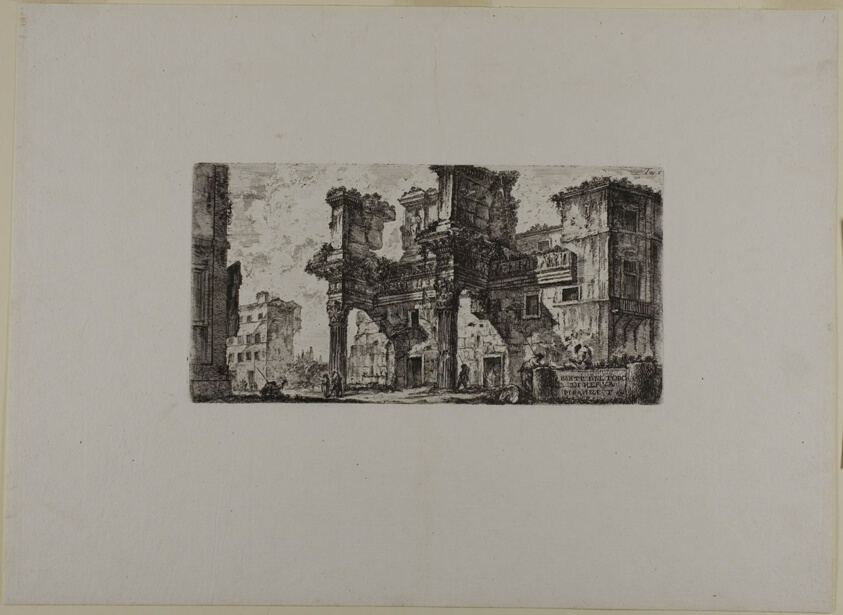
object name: Print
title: Part of the Forum of Nerva, plate five from Some Views of Triumphal Arches and other monuments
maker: Giovanni Battista Piranesi (Italian, 1720-1778)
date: published 1748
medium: Etching in black on ivory laid paper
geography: Italy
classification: etching; print; prints and drawing